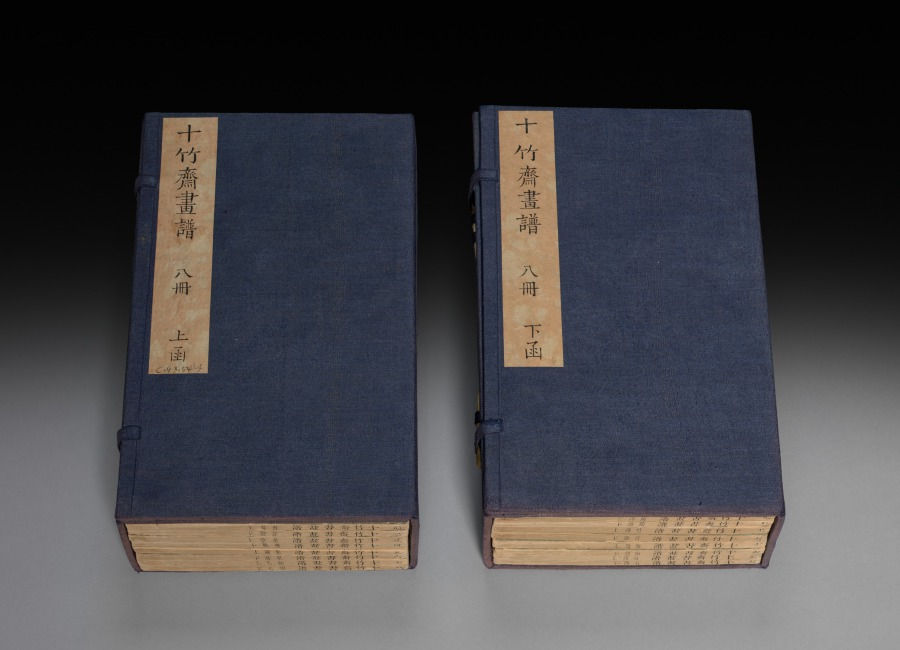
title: Ten Bamboo Studio Collection of Calligraphy and Painting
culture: China, Qing dynasty (1644–1911)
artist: Hu Zhengyan (Chinese, c. 1584–1674)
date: 1633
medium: Woodblock-printed book; ink and colors on paper; first edition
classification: Print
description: Color printing reached a level of perfection in the early 1600s, as seen in this Ten Bamboo Studio Collection of Calligraphy and Painting and the Mustard Seed Garden Manual of Painting (printed 1679 and 1701). The painterly quality, precision in registering (aligning) the woodblocks, and harmonious colors made them the most successful color print editions in Chinese history. Both editions were printed and compiled in Nanjing, spread nationwide, and had a great impact on the arts in Japan and Korea.